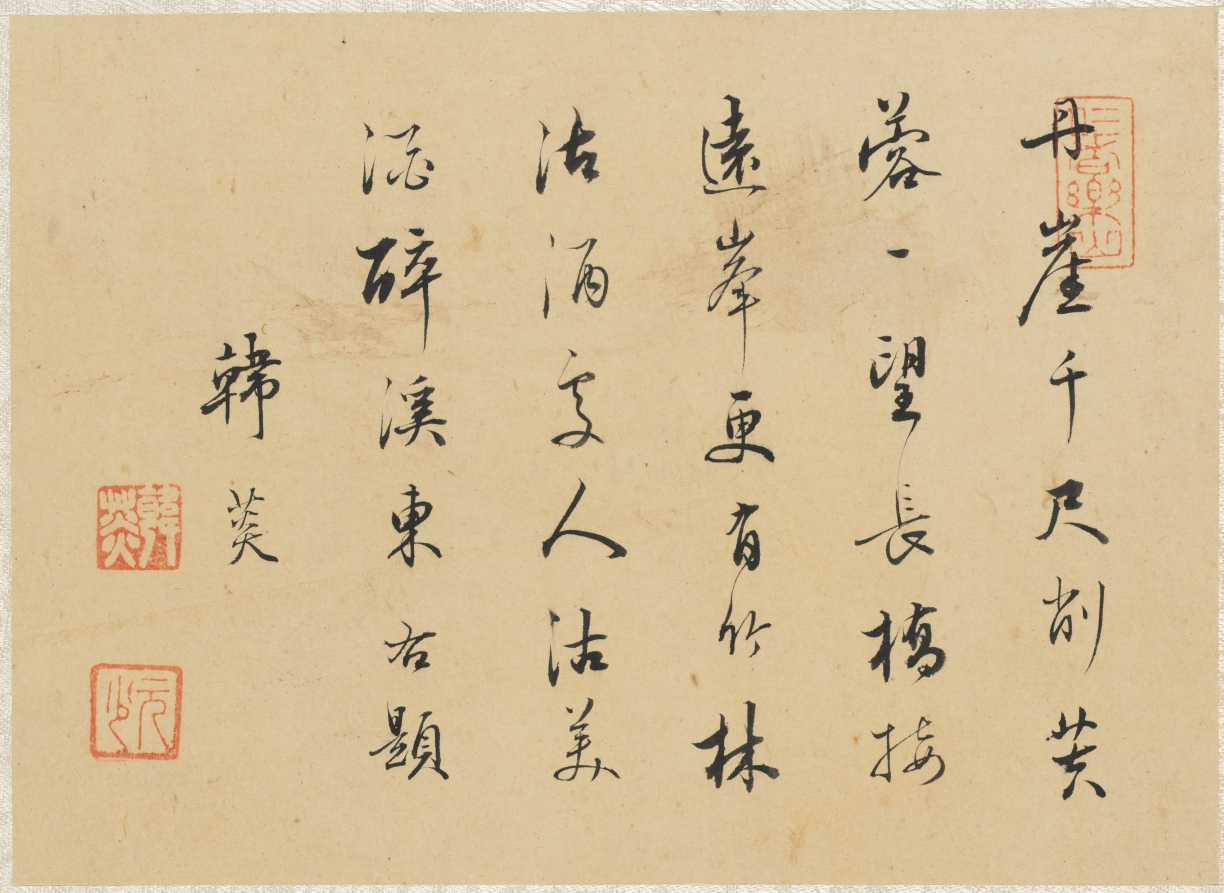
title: Album of Miscellaneous Subjects, Leaf 2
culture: China, Qing dynasty (1644-1911)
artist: Fan Qi (Chinese, 1616–after 1694)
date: early 1650s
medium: album leaf, ink and color on silk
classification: Painting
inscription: Artist seal: Fan Qi 樊圻. Poem by Han Tan 韓菼 (1637–1704): A thousand feet of red cliffs look like a sculptured flower of Fu-yung;/ In one glance, the long bridge joins adjacent ridges./ Furthermore a wine shop stands in a bamboo grove;/ The fellow who bought some good wine is drunk on the eastern shore of the stream.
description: Fan Qi's painting on this second leaf of the album is, perhaps, based on Du Mu's poetic line: The herdboy pointed to the distant Apricot Village. Han Tan's calligraphic colophon facing the painting reads: A thousand feet of red cliffs look like a sculptured flower of furong; In one glance, the long bridge joins adjacent ridges. Furthermore a wine shop stands in a bamboo grove; The fellow who bought some good wine is drunk on the eastern shore of the stream.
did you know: A wine shop's flag is visible above the bamboo grove.